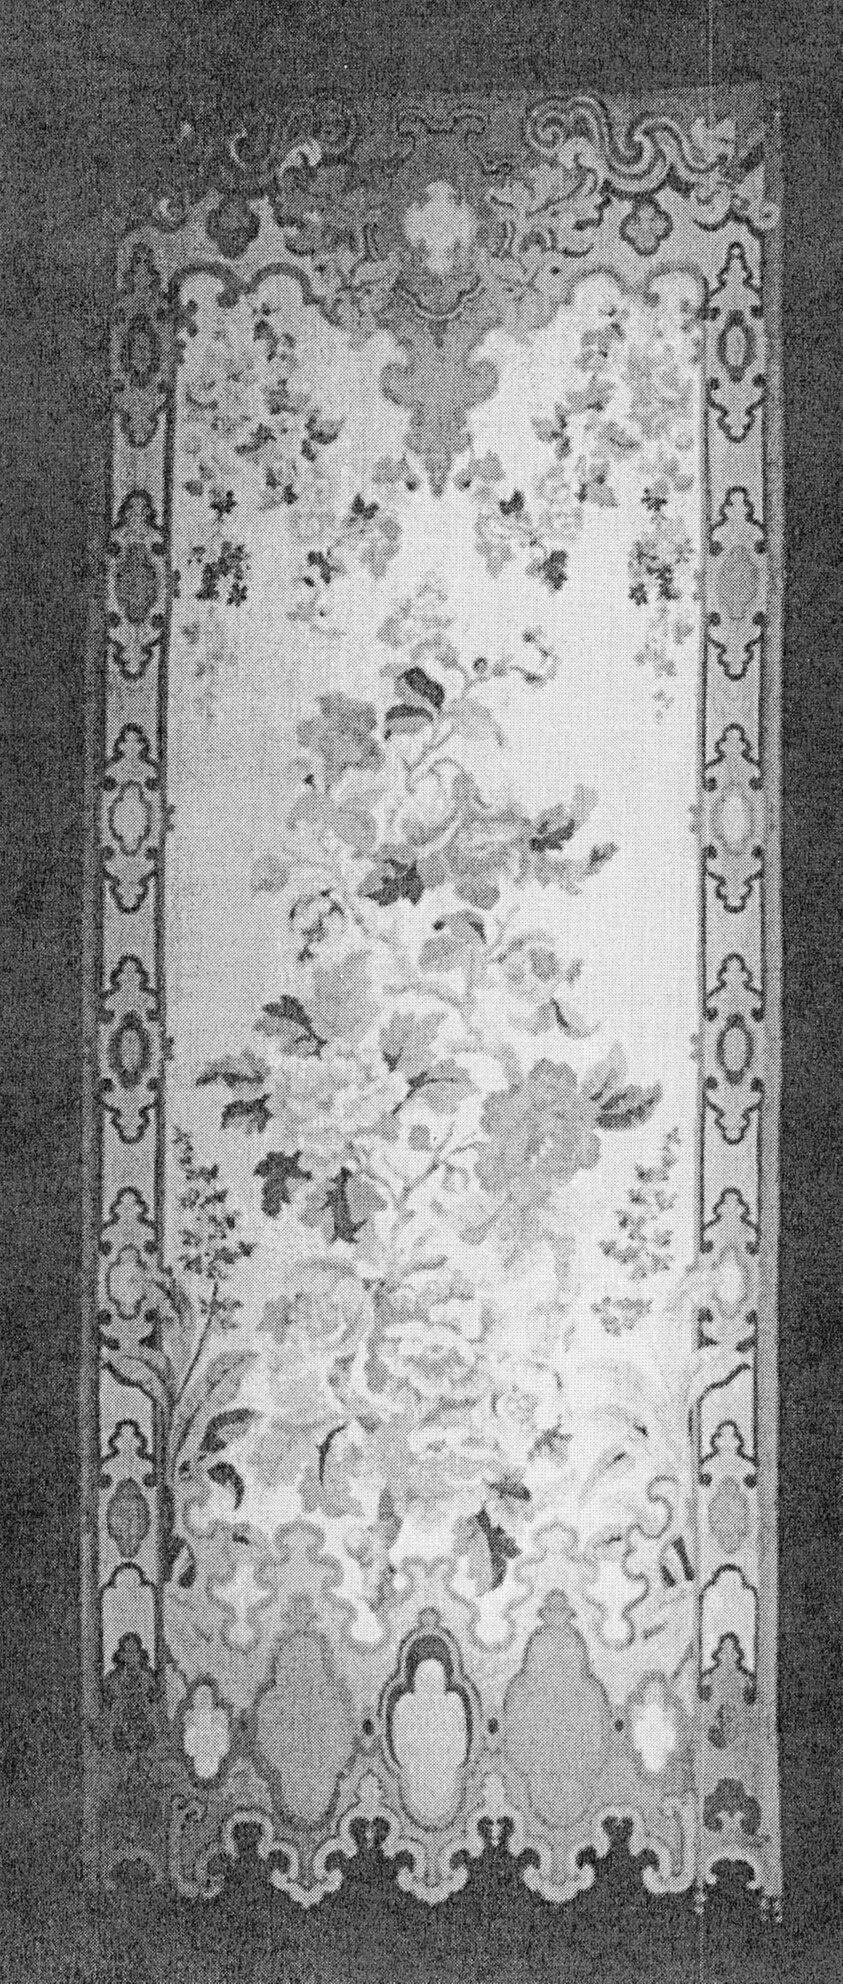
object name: Textile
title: Panels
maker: France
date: Late 19th century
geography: France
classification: weaving - tapestry; textile